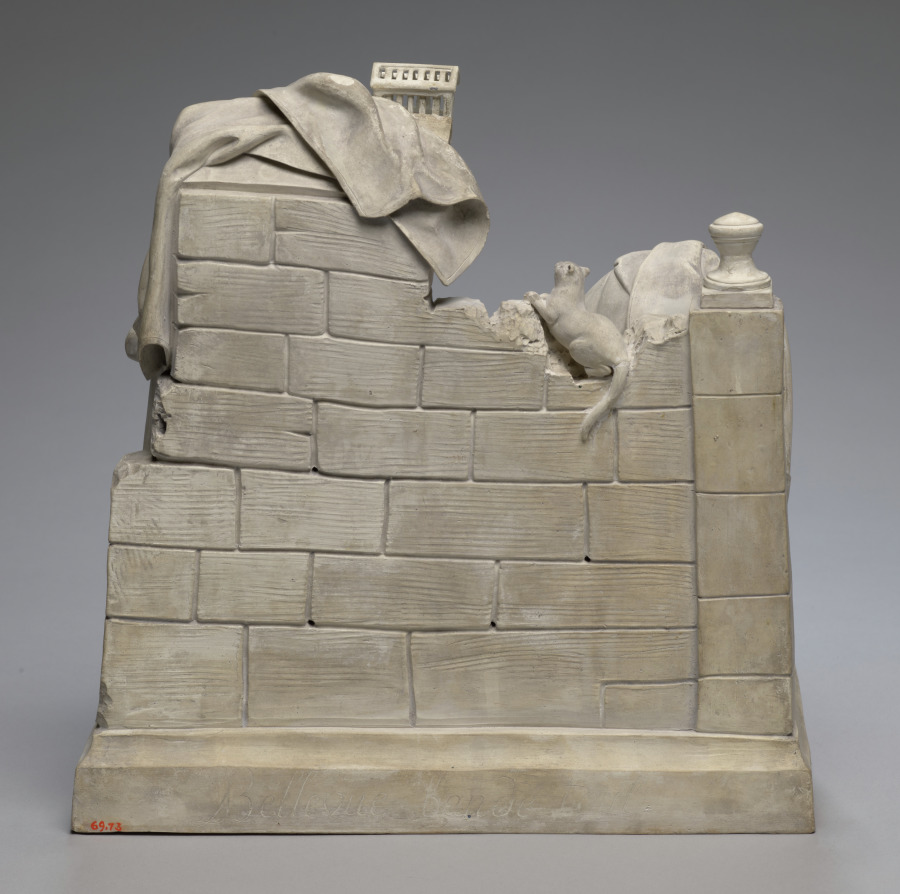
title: The Cobbler and His Bird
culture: France, Bellevue near Toul, late 18th century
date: late 1700s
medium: earthenware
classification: Ceramic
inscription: incised inscription on back of base: "Bellevue van de Toul."